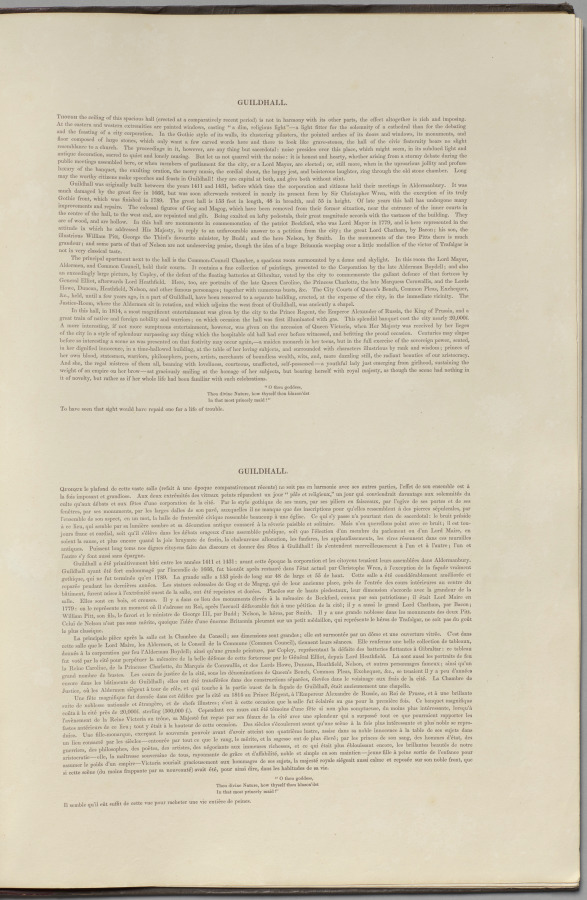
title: London As It Is: Guildhall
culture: England, 19th century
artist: Thomas Shotter Boys (British, 1803–1874)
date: 1842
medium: lithograph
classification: Bound Volume